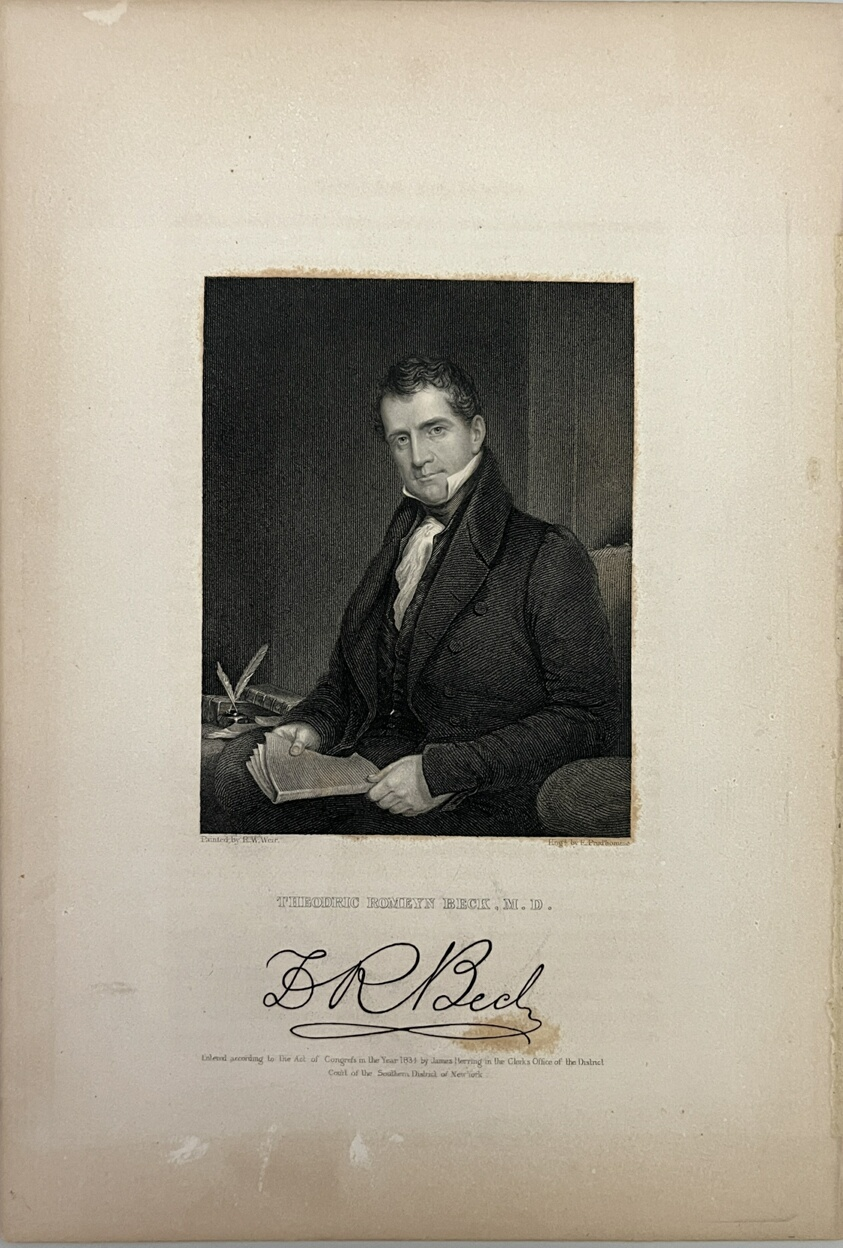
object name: Print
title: Theodric Romeyn Beck, M.D.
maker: E. Prud'homme (likely French, 19th century); after Robert Walter Weir (American, 1803-1889)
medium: Steel engraving on paper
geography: France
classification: reproduction; print; prints and drawing